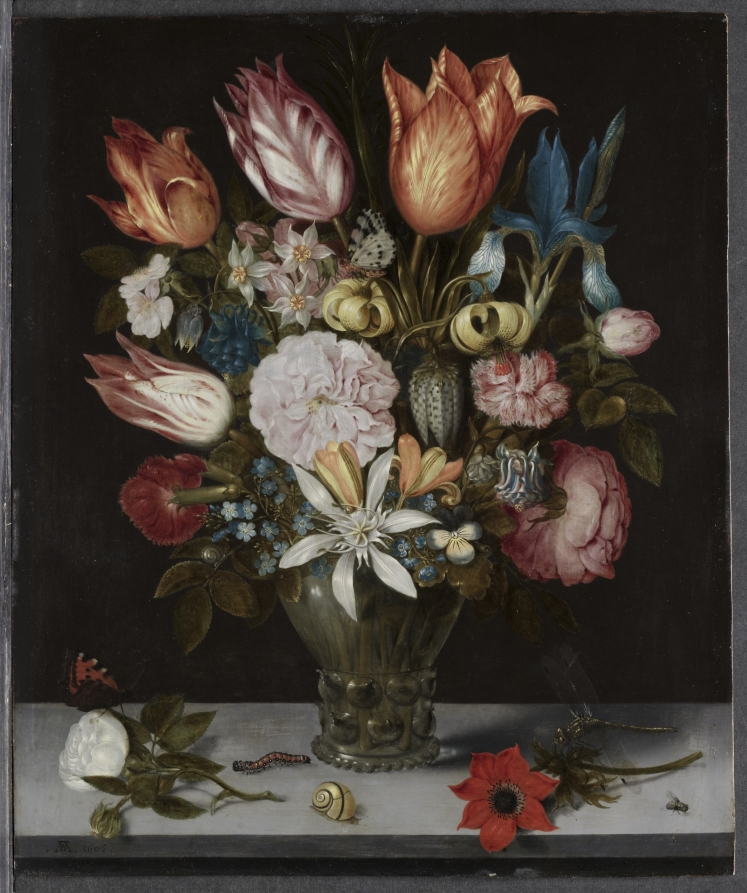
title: Flowers in a Glass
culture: Netherlands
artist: Ambrosius Bosschaert (Dutch, 1573–1621)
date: 1606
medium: oil on copper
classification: Painting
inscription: Signed lower left: "AB 1606. [AB ligated]"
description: One of the first artists to specialize in flower painting, Ambrosius Bosschaert may have been inspired by the botanical gardens and scientific collections in his hometown of Middelburg. The flowers in this bouquet might be common today, but in the 1600s they were costly rarities. Bosschaert captured their fragile beauty with luminous colors and exquisite detail.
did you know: Snails, butterflies, moths, dragonflies, and other insects make this "still life" come alive!